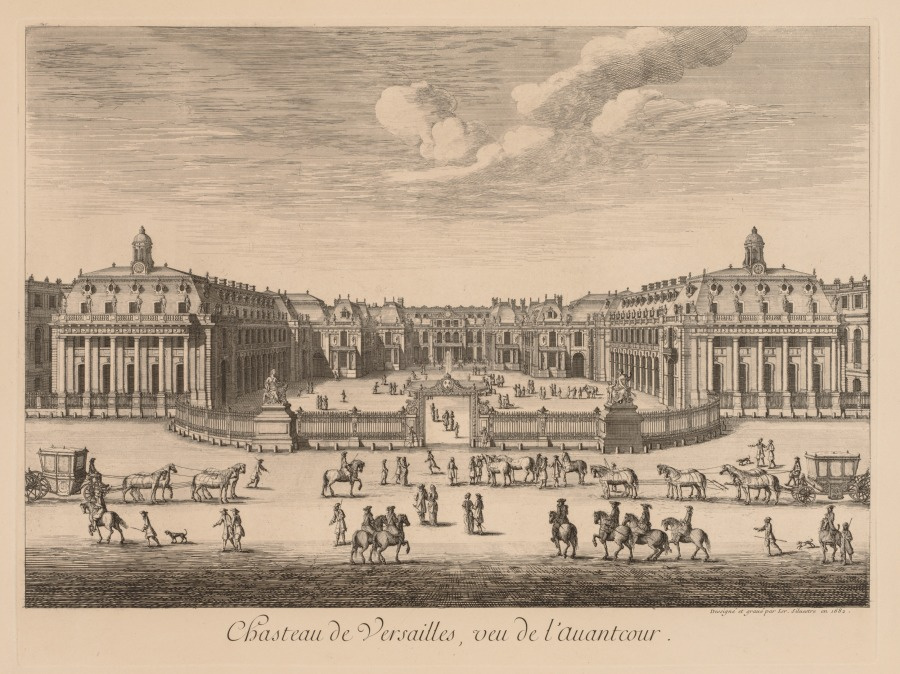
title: Vue du Château de Versailles, vu de l'avant-cour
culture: France, 17th century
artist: Israël Silvestre (French, 1621–1691)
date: 1682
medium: engraving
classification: Print